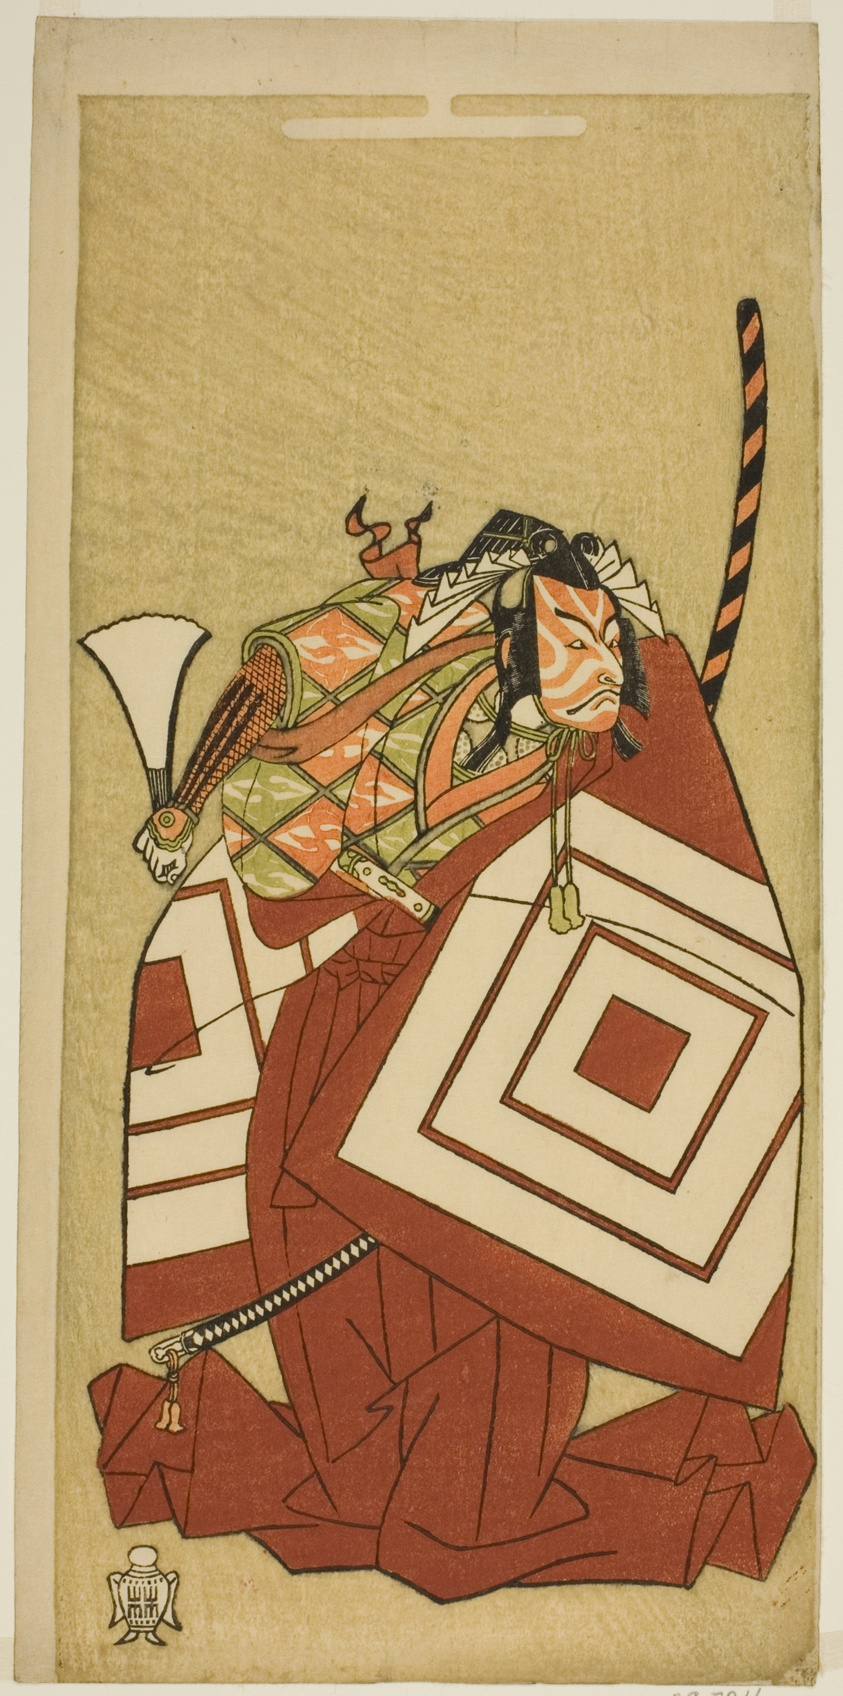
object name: Print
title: The Actor Ichikawa Danjuro V as Watanabe Kiou Takiguchi in the Play Nue no Mori Ichiyo no Mato, Performed at the Nakamura Theater in the Eleventh Month, 1770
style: Japanese (culture or style)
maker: Attributed to Katsukawa Shunsho 勝川 春章; Japanese, 1726-1792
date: c. 1770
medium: Color woodblock print; hosoban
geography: Japan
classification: woodblock print; print; asian art